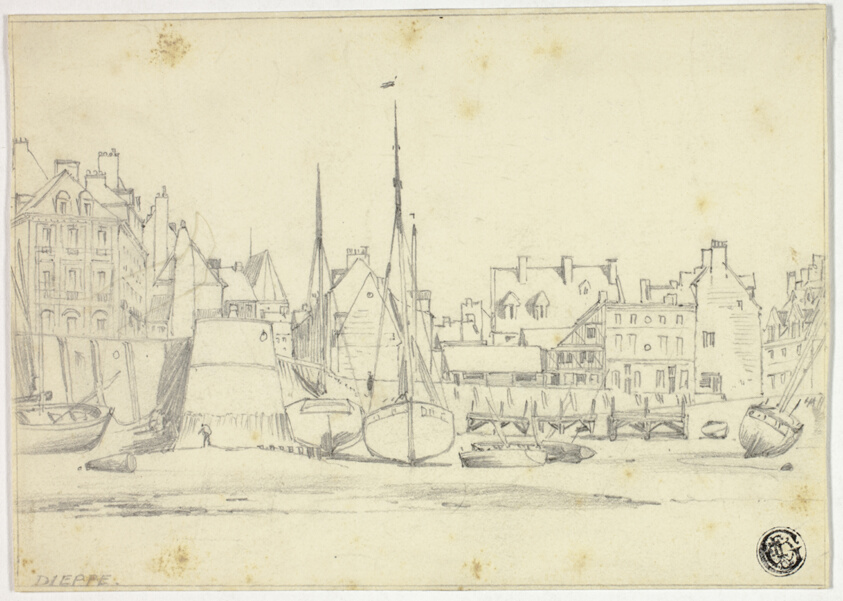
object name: Drawing and Watercolor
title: Dieppe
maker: Edward William Cooke (English, 1811-1880)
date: c. 1850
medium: Graphite on ivory wove paper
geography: England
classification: graphite; drawings (visual works); prints and drawing